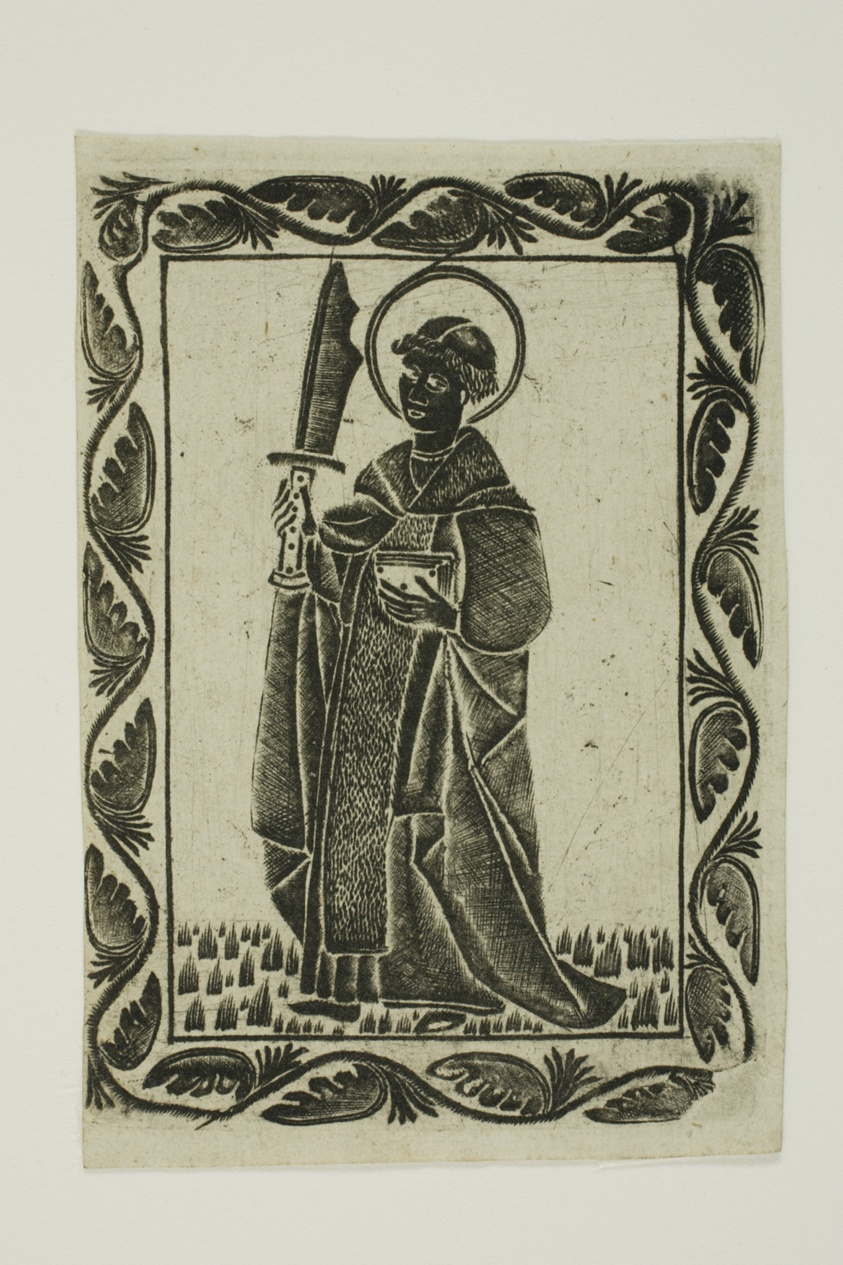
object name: Print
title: Saint Peter Martyr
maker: Unknown artist (German, 15th century)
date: c. 1450–60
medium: Metal cut printed on paper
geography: Germany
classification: dotted/metal cut; print; prints and drawing